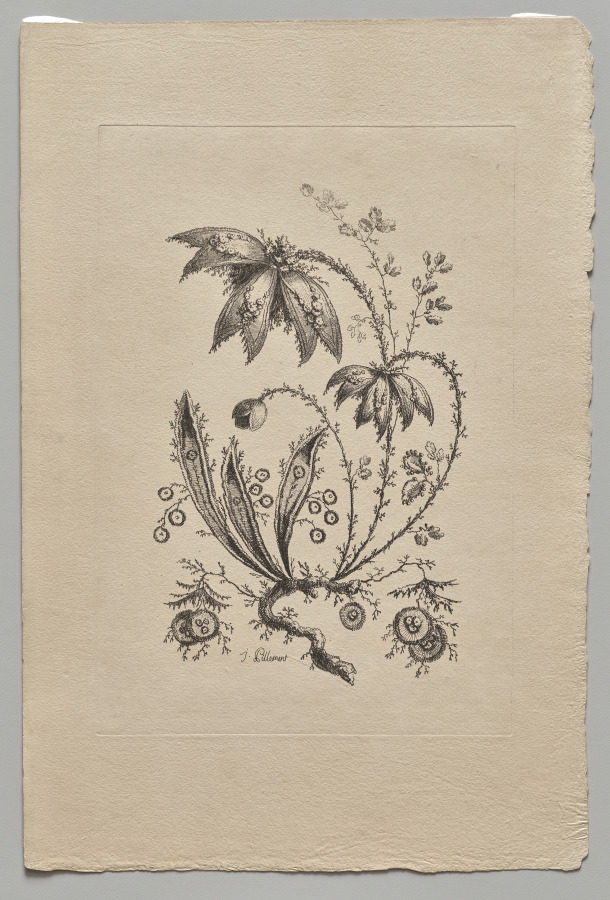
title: Persian Flowers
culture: France, 18th century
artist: Jean Baptiste Pillement (French, 1728–1808)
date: 1755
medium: etching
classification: Print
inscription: WM: a partial (bottom half) Dovecote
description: Jean Baptiste Pillement was one of the most influential designers of the Rococo period, known for his varied and prolific chinoiseries (European variants of Chinese and Japanese motifs). His designs were spread throughout Europe primarily via their translation into prints. This print is one of a set of six etched by Pillement himself. Each depicts a so-called “Persian” flower, largely fantasies, presenting strange, alien-like floral forms that could be adapted to various uses from textiles to wall decorations.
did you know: The artist Jean Baptiste Pillement was employed by Marie Antoinette to create decorations for her legendary retreat, the Petit Trianon, at Versailles.